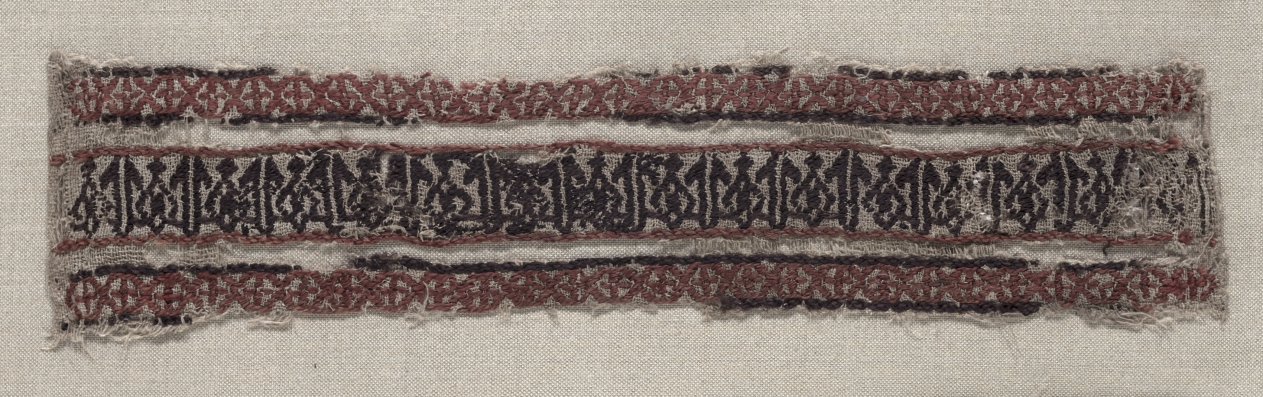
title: Woven Band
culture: Egypt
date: before 1929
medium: wool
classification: Textile